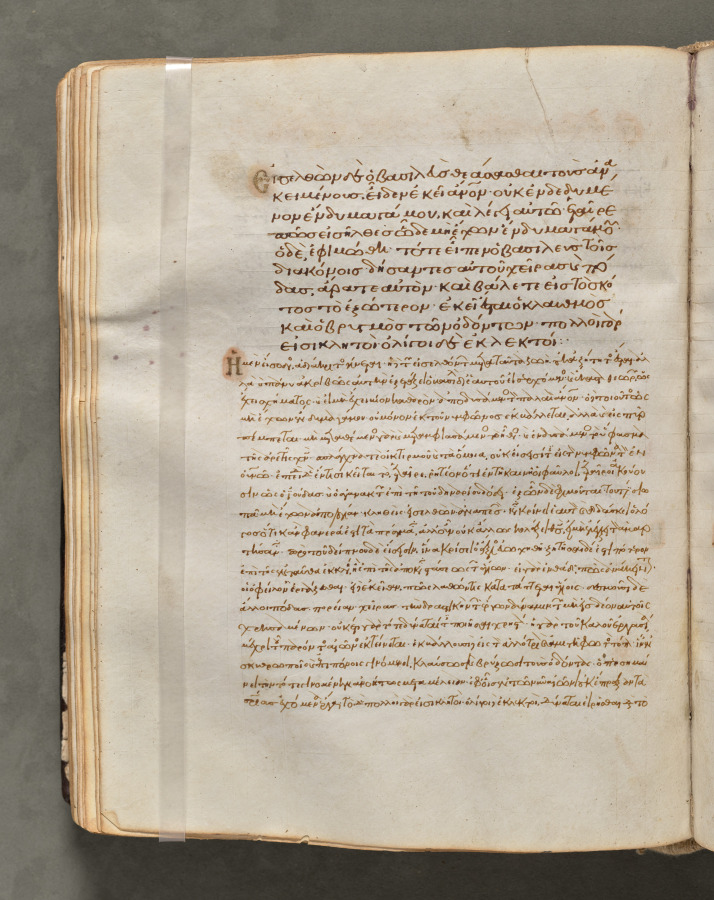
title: Text, folio 97 (verso), from a Gospel Book with Commentaries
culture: Byzantium, Constantinople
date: c. 1000–1100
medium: ink, tempera, and gold on vellum; leather binding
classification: Bound Volume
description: Each of the four gospels in this book opens on a page with brilliantly illuminated borders depicting the author of the text as well as birds-principally peacocks, symbols of the immortality of the soul-and fountains, representing the fountain of life and the salvation of the soul. This volume consists of 428 leaves with texts in Greek. Its level of sophistication suggests that it was probably written and decorated in a monastery in Constantinople.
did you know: Gospel Books were carried in procession through Byzantine churches.